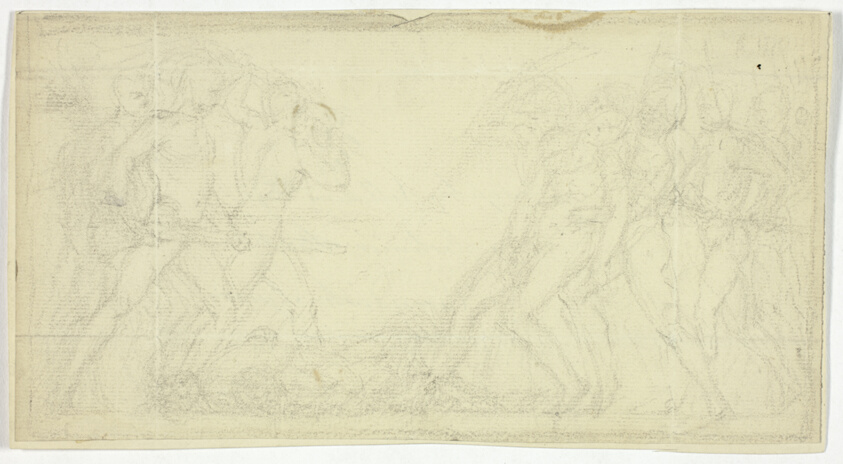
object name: Drawing and Watercolor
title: Frieze of Warriors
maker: Unknown Artist (British or French, 19th century); or possibly Thomas Stothard (English, 1755-1834)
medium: Black chalk on off white laid paper, tipped on ivory wove paper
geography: United Kingdom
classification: chalk; drawings (visual works); prints and drawing